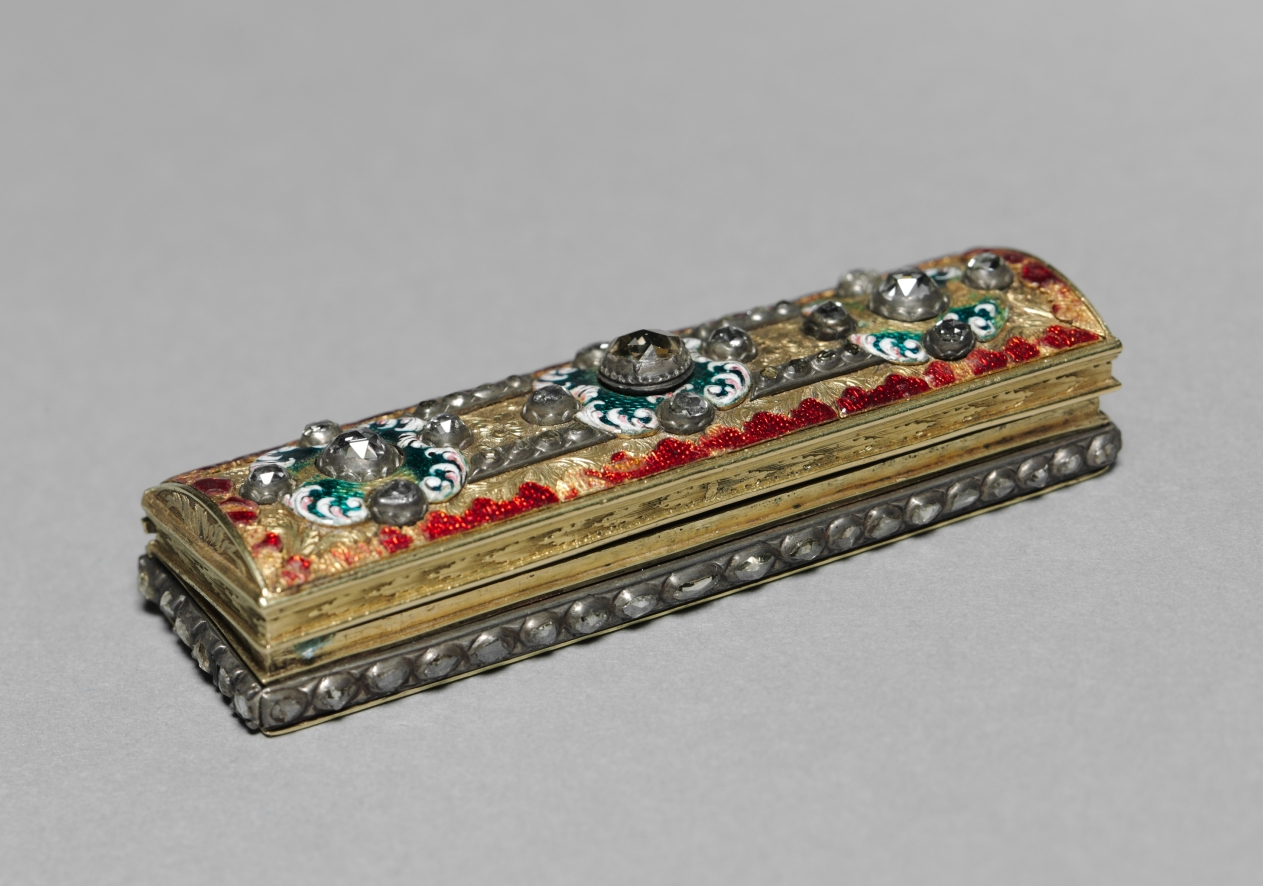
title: Box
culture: France, 19th century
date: 1800s ?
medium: gilt metal, enamel, brilliants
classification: Miscellaneous